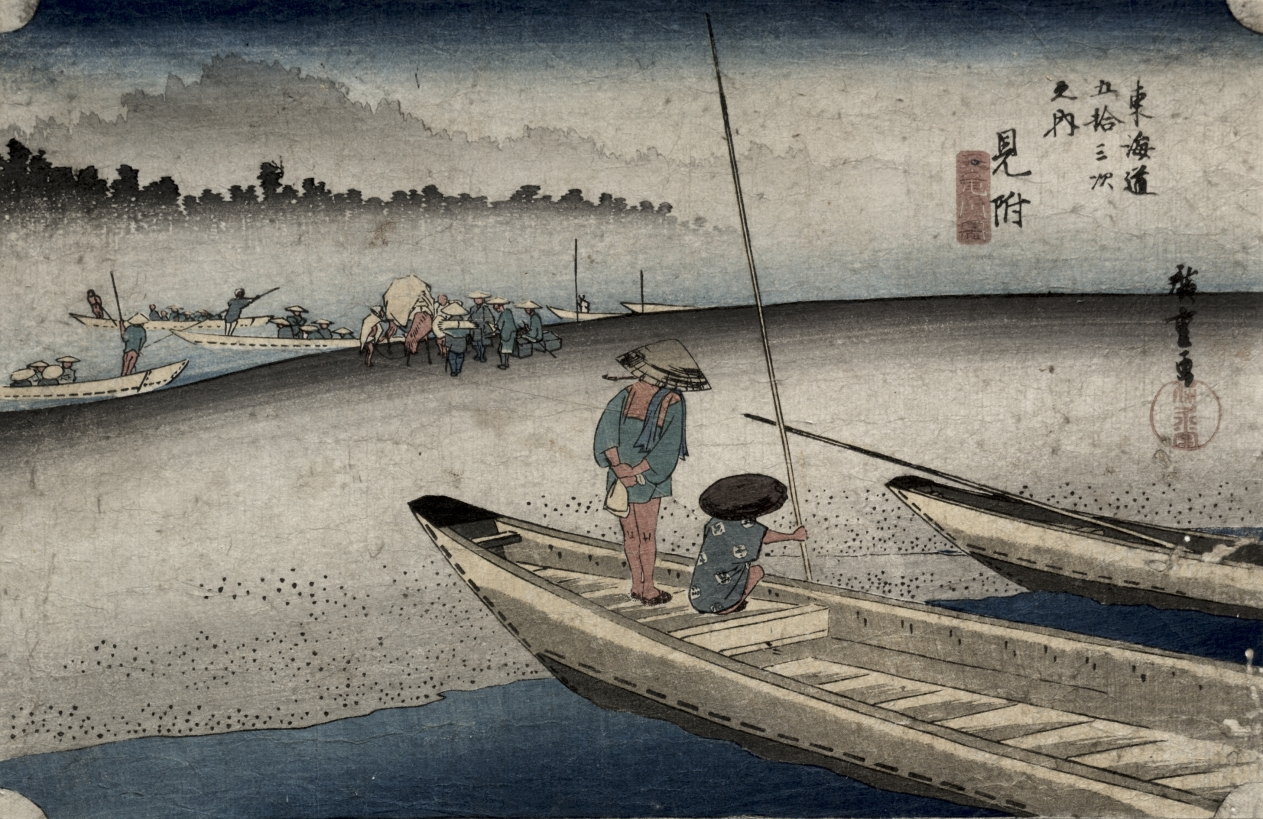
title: Picture of the Tenryu River near Mitsuke (Station 29), from the series Fifty-Three Stations of the Tokaido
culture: Japan, Edo period (1615–1868)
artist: Utagawa Hiroshige (Japanese, 1797–1858)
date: 1833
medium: color woodblock print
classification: Print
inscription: Signature: Hiroshige ga Publisher: Takenouchi Magohachi (Hoeido)